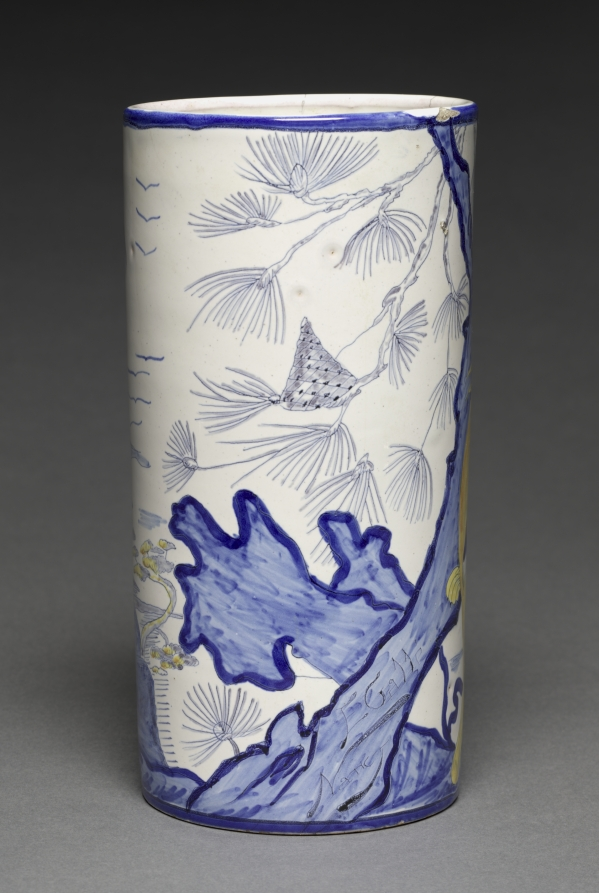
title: Vase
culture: France, 19th century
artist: Emile Gallé (French, 1846–1904)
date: c. 1885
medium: earthenware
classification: Ceramic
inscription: inscribed on tree trunk: "E Galle/Nancy."